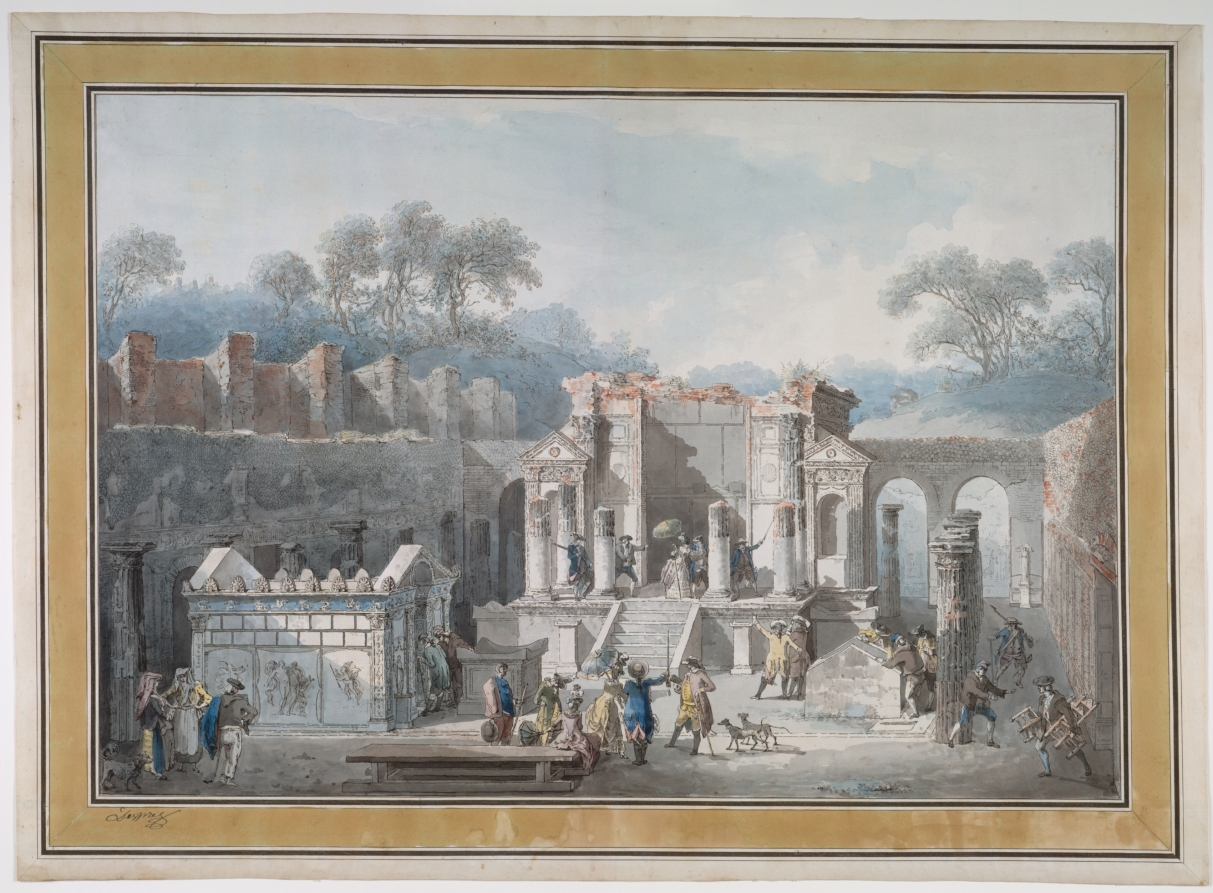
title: The Temple of Isis at Pompeii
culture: Italy, 18th century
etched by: Francesco Piranesi (Italian, 1758–1810)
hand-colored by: Louis Jean Desprez (French, 1743–1804)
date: 1788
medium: etching, hand-colored with watercolor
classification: Print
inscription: signed in black ink on decorative margin, lower margin:Desprez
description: Buried under layers of volcanic ash since the eruption of Mount Vesuvius in 79 CE, the ancient Roman sites of Herculaneum and Pompeii were rediscovered and excavated in the 1700s. Remarkably well preserved, the two cities captured the imagination of Enlightenment Europe. Artists Francesco Piranesi and Louis Jean Desprez capitalized on the popularity of the ancient sites, creating an innovative souvenir of Pompeii. Etched by Piranesi, the prints were based on Desprez’s real-life observations. The latter artist hand colored and signed select impressions that the two advertised as dessins coloriés, or colored drawings, meant only for hommes de goût, or "men of taste."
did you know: Francesco Piranesi visited Pompeii with his father in the 1770s.